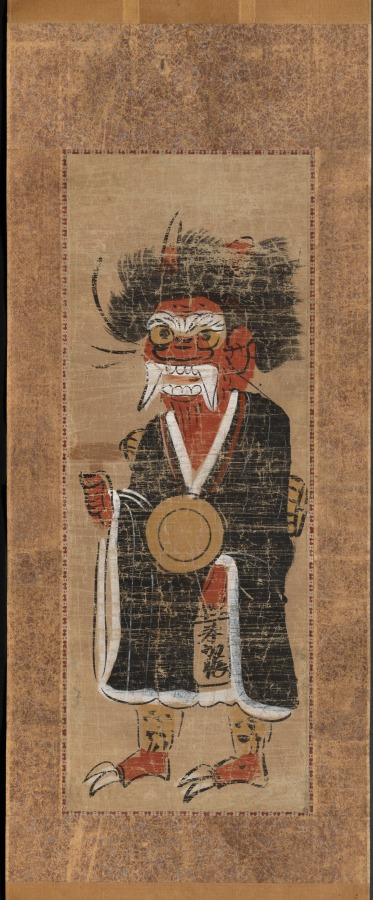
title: Demon Intoning the Name of the Buddha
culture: Japan, Edo period (1615–1868)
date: 1700s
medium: hanging scroll, ink and color on paper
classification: Painting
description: Images like this one that depicts a demon in the guise of an itinerant monk intoning the name of the Buddha are called Otsu-e, or "Otsu paintings." Otsu-e were made as souvenirs for travelers passing through the station of Otsu along the Tokaido, the route stretching from Edo (modern-day Tokyo) to Kyoto. Realized through a combination of woodblock printing, rapid brushstrokes, embellishment with color and gold pigments by stencil or by hand, the earliest Otsu-e, produced in the 17th century, were Buddhist and Shinto icons. Later images included figures popular from Kabuki plays, as well as scenes illustrating parables.